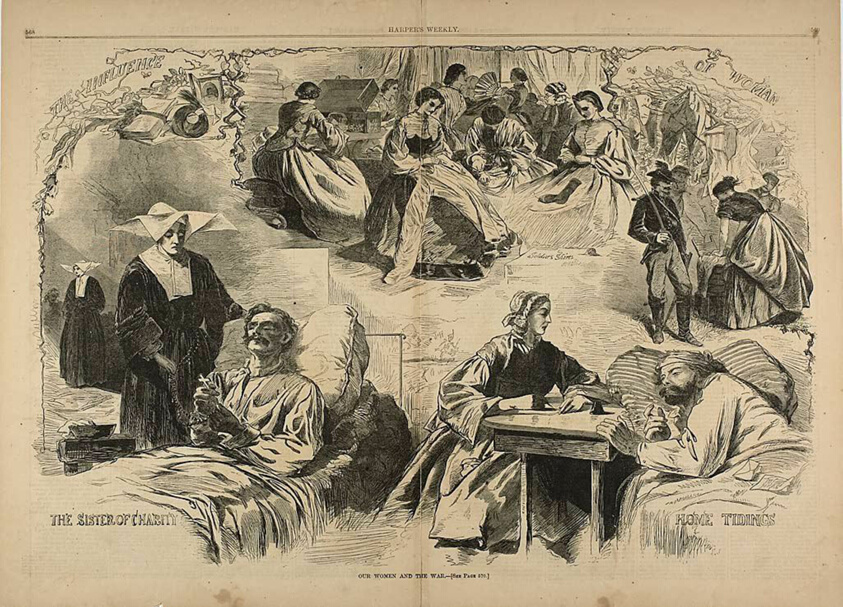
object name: Print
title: Our Women in the War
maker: Winslow Homer (American, 1836-1910); published by Harper's Weekly (American, 1857-1916)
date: published September 6, 1862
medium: Wood engraving on paper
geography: United States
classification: wood engraving; print; prints and drawing